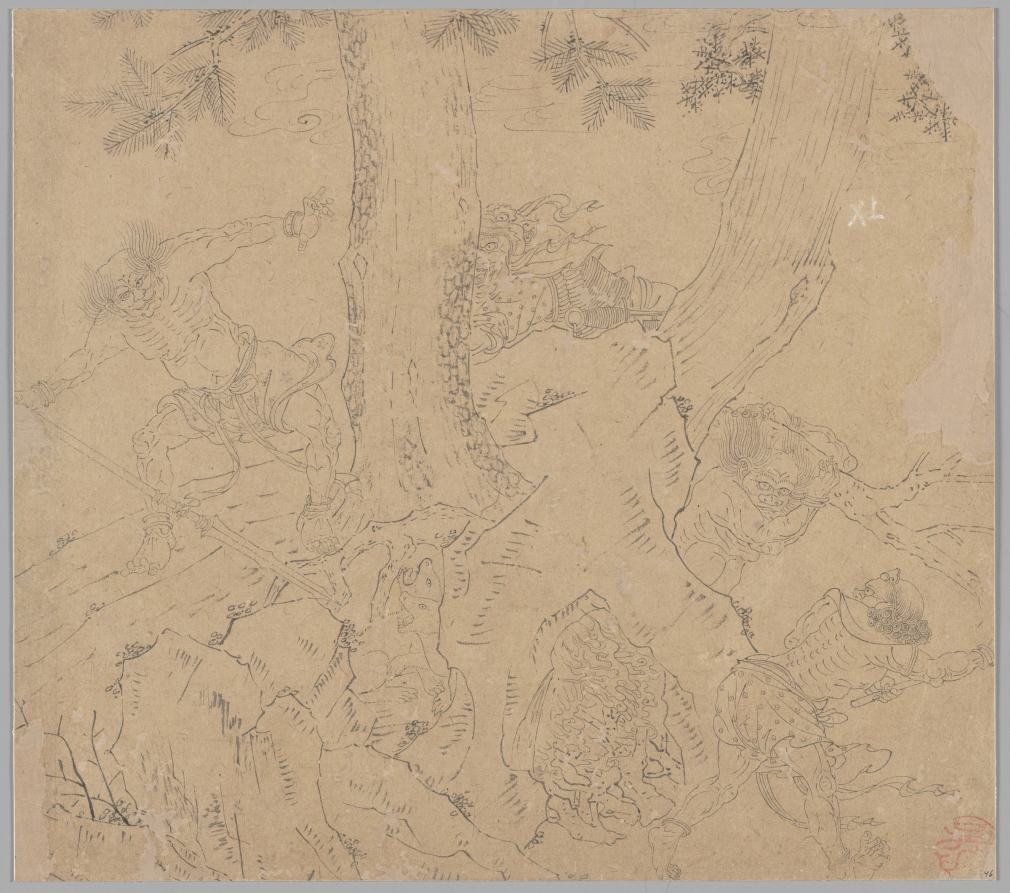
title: Album of Daoist and Buddhist Themes: Search the Mountain: Leaf 46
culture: China, Southern Song dynasty (1127-1279)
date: 1200s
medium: Album, ink on paper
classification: Painting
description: Part of the series “Clearing the Mountains” (soushan tu), this leaf depicts a soldier who uses his spear to probe a hollow in which two wolves are hiding. To the right of the pine trees at the center are three soldiers, two of whom are searching for their targets, and one carrying an enormous log.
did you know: Two soldiers create a fire to drive the wolves out.